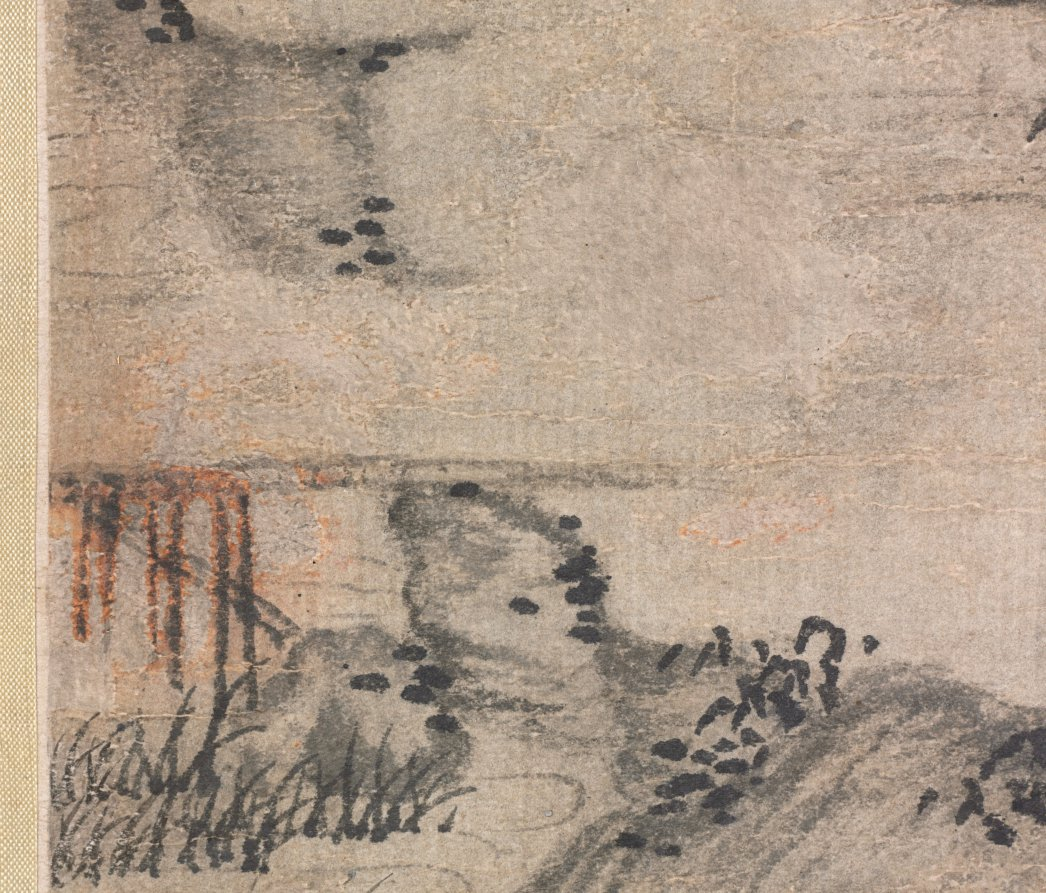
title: Streams and Mountains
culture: China, Yuan dynasty (1271-1368)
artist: Xu Ben (Chinese, 1335–1380)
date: 1372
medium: hanging scroll, ink on paper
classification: Painting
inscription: 綠樹黃鸝處處山， 偶從谿上看雲還。/ 人生未許全無事， 纔得登臨便是閑。 壬子七月十日徐賁為吉夫先生畫 並詩共上 [印] 幼文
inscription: Label on mounting probably by Liang Qingbiao 梁清標 (1620–1691).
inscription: 4 additional inscriptions and 9 additional seals: 1 poem of Xie Hui 謝徽 (c. 2nd half 14th c.); 1 poem and 1 seal of Gao Qi 高啟 (1336–1374); 1 poem and 1 seal of Lu Zhen 盧貞 (c. late 14th c.); 1 poem of Huang Zai 黃載; 3 seals of Liang Qingbiao 梁清標 (1620–1691); 1 seal of Wang Jiqian [C. C. Wang] 王季遷 (1907–2003); 3 seals unidentified.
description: Like many literati of the late Yuan and early Ming dynasties, Xu Ben was entangled with the perils of dynastic change as well as the ups and downs of his official career. It was mainly through the art of painting and poetry, as well as the ideal of reclusion, that he sought feelings of exhilaration and shared them with his friends. Xu created this monumental landscape during one of his periods of reclusion. His innumerable “hemp-fiber” texture strokes create a unifying rhythm among the towering mountains with tightly knit masses of rocks. Nestled among shady trees at the base of the mountain is a rustic retreat, which a scholar approaches on foot to visit with the hermit. Among the five inscriptions at the top of the painting is one by the artist himself. He dedicated the painting to someone named Jifu 吉夫 and recorded a poem in praise of mountains. Green trees, yellow orioles, everywhere are mountains; Aimlessly I return from the stream, where I watched the clouds. Man's life does not allow unbroken ease, But to be able to be high up in the mountain, this is leisure.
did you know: An attendant opens a reed gate to welcome the scholar with a walking stick approaching the rustic retreat.